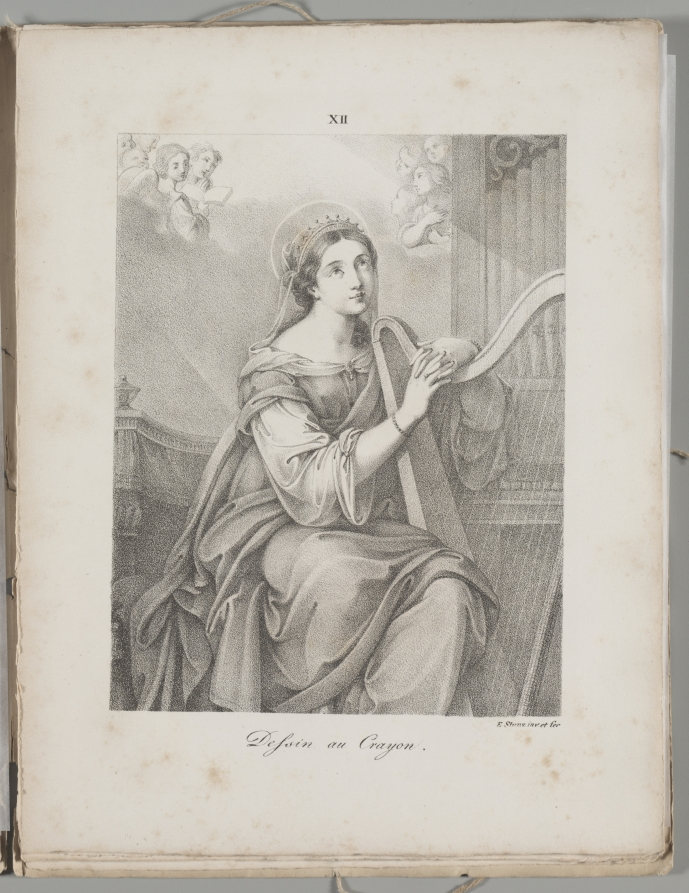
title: Art of the Lithograph: Saint Cecily, Plate XII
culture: Germany, 19th century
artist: Alois Senefelder (German, 1771–1834)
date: 1819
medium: lithograph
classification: Portfolio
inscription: On plate: lower right: E. Stunz inv. et fec; center: Dessin au Crayon; upper center: XII